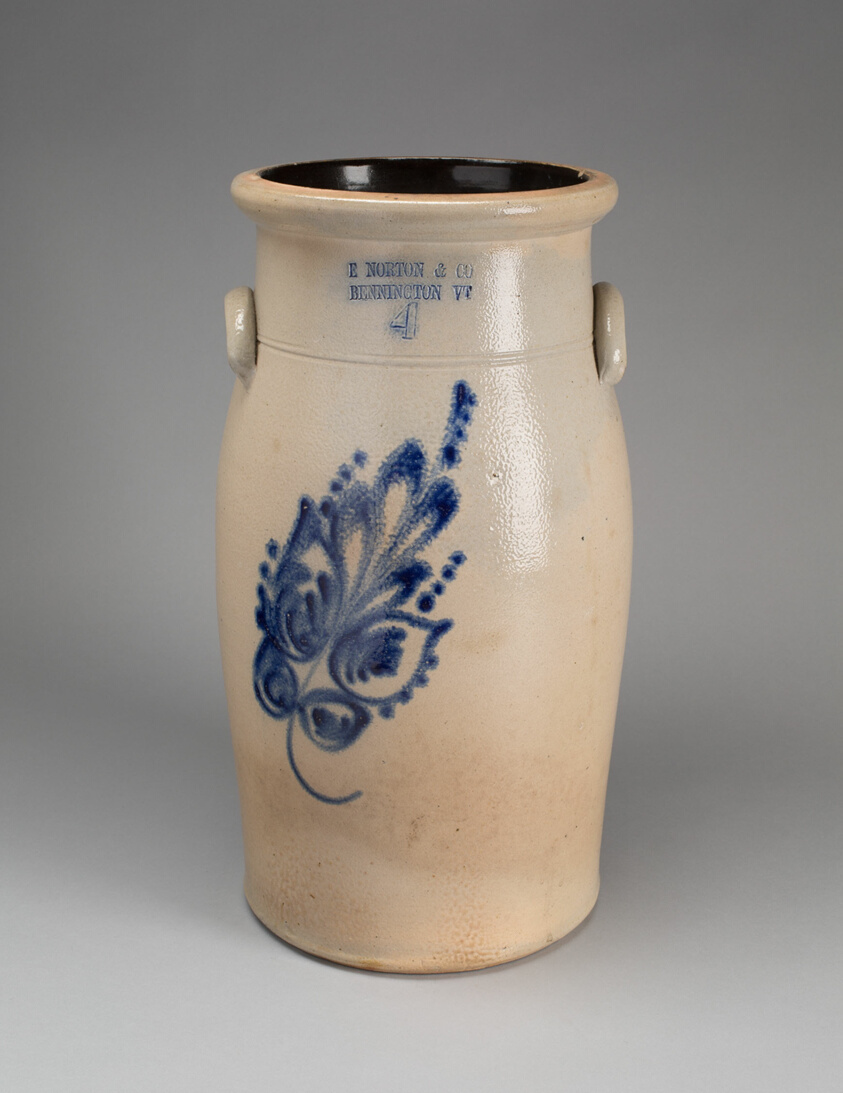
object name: Ceramics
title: Churn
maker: E. Norton & Co.; American, 1881–1885; Bennington, Vermont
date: 1881–85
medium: Stoneware and salt glaze with cobalt oxide glaze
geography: Bennington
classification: vessel; stoneware; ceramics; american decorative arts; american arts; decorative arts